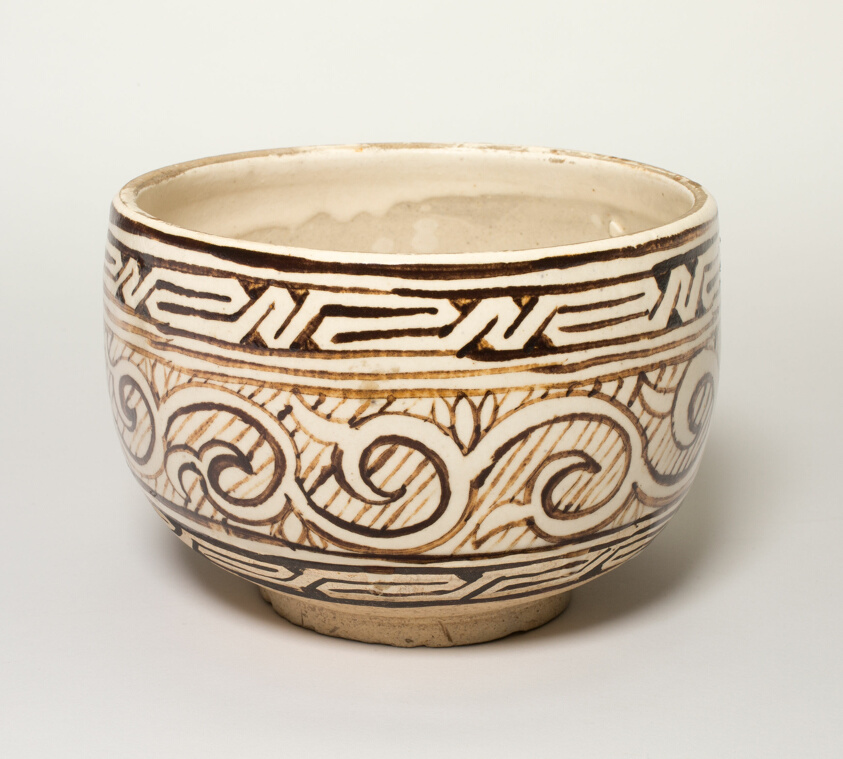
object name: Vessel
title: Jar with Stylized Scrolls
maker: China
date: Ming dynasty (1368–1644)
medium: Cizhou ware; stoneware with white slip and iron-brown glazes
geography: China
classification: stoneware; asian art; ceramics